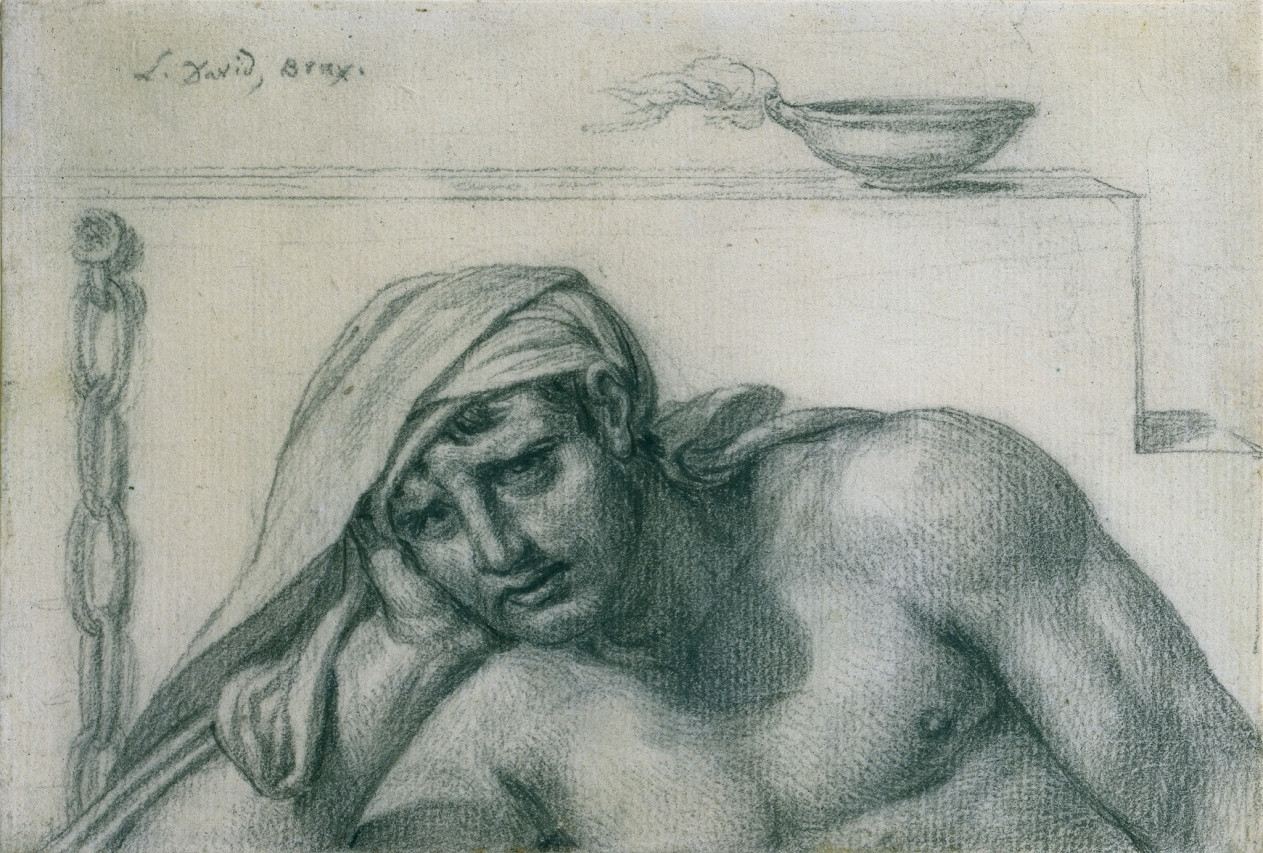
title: The Prisoner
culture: France, 19th century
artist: Jacques-Louis David (French, 1748–1825)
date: c. 1816–22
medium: black chalk on cream laid paper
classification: Drawing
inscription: inscribed, at upper left, in black chalk: L. David, Brux.; inscribed, on an old support, now removed: 1 des. de L. David.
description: This drawing belongs to a series of enigmatic sheets that the French artist Jacques-Louis David created while living as an exile in Brussels from 1816 until his death in 1825. Many of these untitled works present close-up views of expressive heads and were given by the artist to his friends. This image of a turbaned man next to a hanging chain and oil lamp loosely references David's painting The Intercession of Saint Roch (1780) from much earlier in his career.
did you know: Scholars have suggested that Jacques-Louis David might have intended this drawing as a portrait of Napoleon Bonaparte, who the artist supported. The former leader died a prisoner on the island of Saint Helena in 1821.